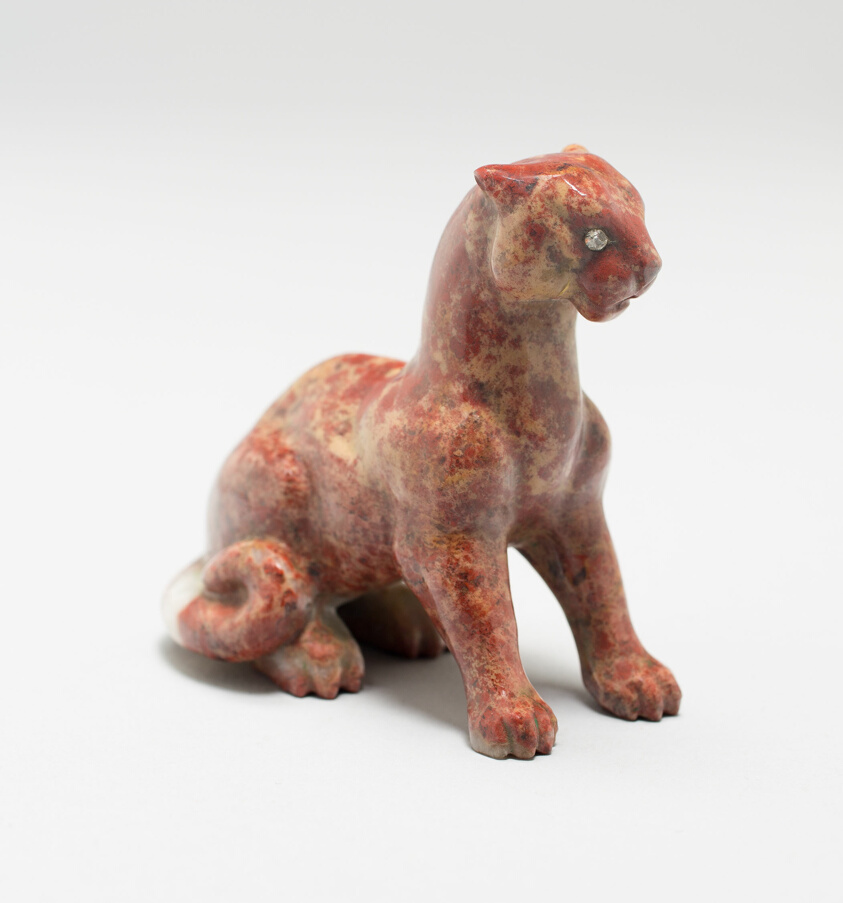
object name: Metalwork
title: Miniature Leopard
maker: Fabergé Workshop; Saint Petersburg or Moscow, Russia, 1842-1917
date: c. 1890/1900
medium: Yellow speckled red agate, white striation, and rose diamonds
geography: Saint Petersburg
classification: stone; miniature; european decorative arts; metalwork